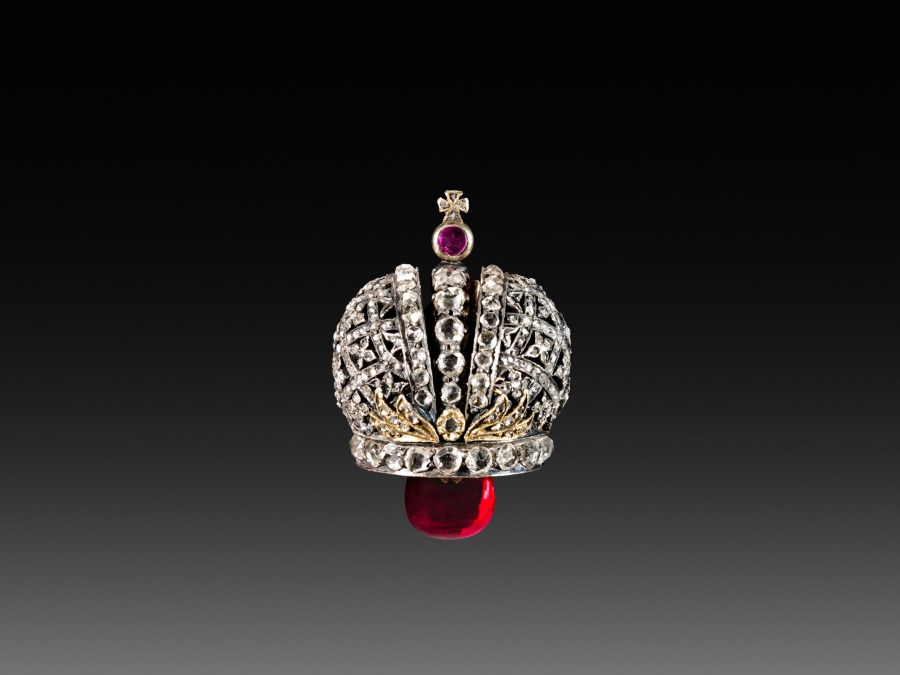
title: Ruby or Pink Sapphire Surprise from the Lapis Lazuli Easter Egg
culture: Russia, St. Petersburg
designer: attributed to Peter Carl Fabergé (Russian, 1846–1920)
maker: attributed to House of Fabergé (Russian, 1842–1918)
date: c. 1885–90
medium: gold, enamel, lapis lazuli, pearls, diamonds, rubies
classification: Miscellaneous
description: This Easter egg, like the subsequent ones produced by Fabergé for the imperial family, contains a surprise when opened. In this case, the egg opens to display a yellow enameled cover, resembling an egg yolk, which then opens to reveal a tiny replica of the Russian imperial crown, containing either a ruby or a pink sapphire suspended on a chain.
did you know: This tiny ruby or pink sapphire dangles from a diamond encrusted crown surprise, which is a replica of the Russian imperial crown made for Empress Catherine the Great in the 1700s.